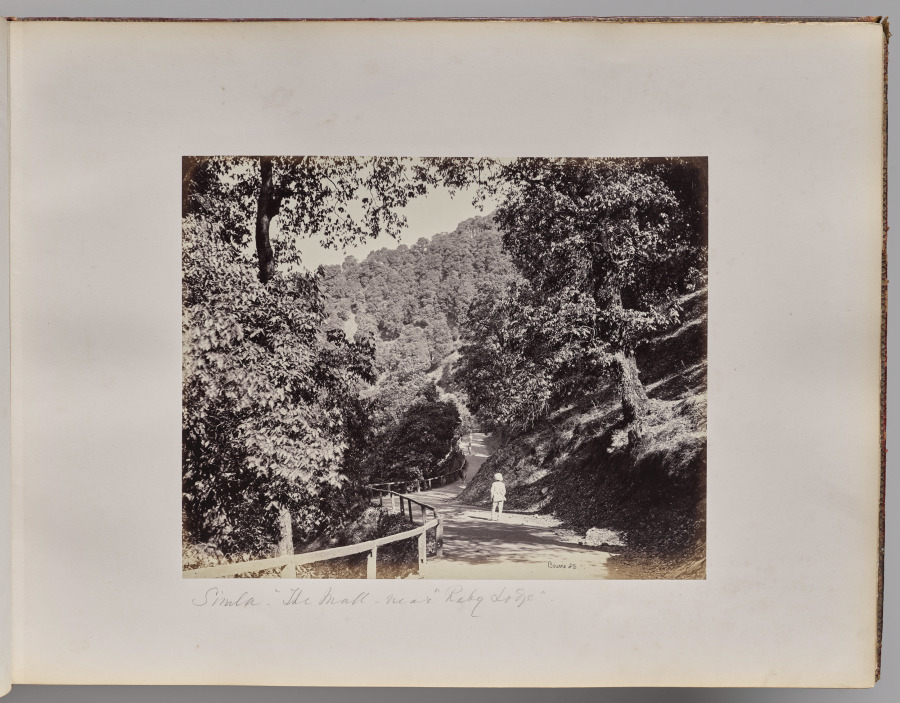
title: Shimla. The Mall near Rabq Lodge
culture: England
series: Photographs of Northern India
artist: Samuel Bourne (British, 1834–1912)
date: 1863–70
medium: albumen print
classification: Photograph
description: The 50 images in this album, all taken in the 1860s, move from the hill towns of the Himalayas down to cities including Lahore (now in Pakistan), Delhi, Lucknow, Agra, Benares (now Varansi), and Calcutta (now Kolkata). Architectural studies of major monuments offer valuable historical records of what sites such as the Taj Mahal and the imperial mosque of the Mughal emperors in Delhi looked like before 20th-century restorations.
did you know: Samuel Bourne, the author of most the images in this album, was a banker in England before he moved to India to become a professional photographer.